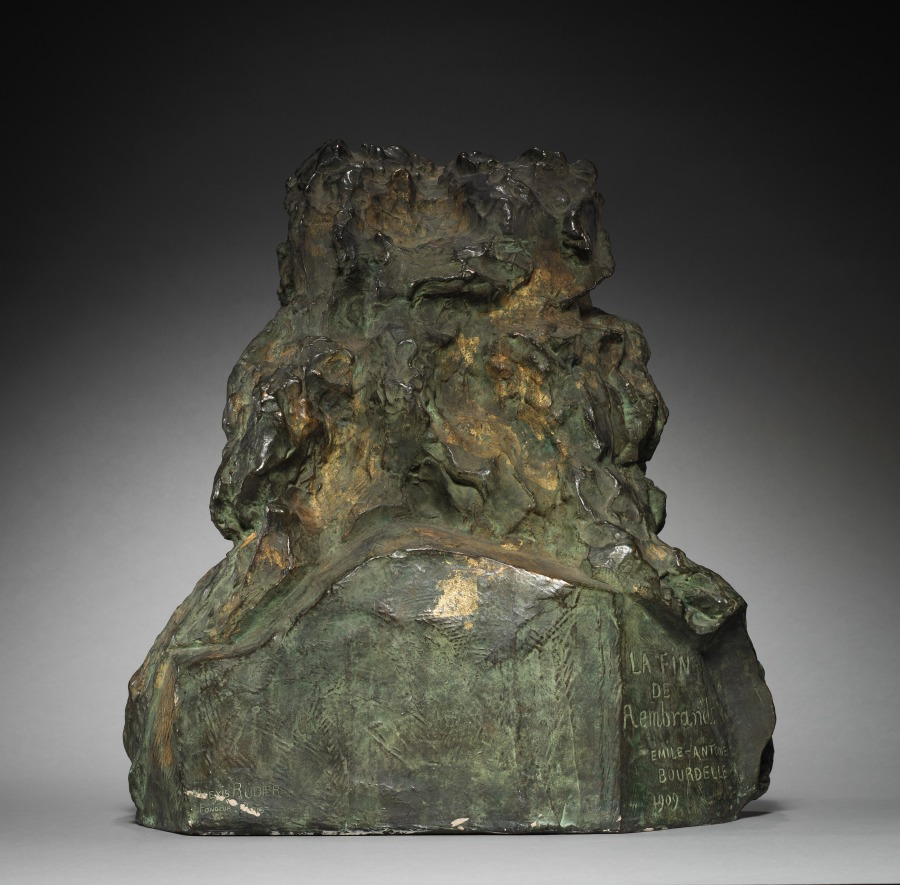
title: The End of Rembrandt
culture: France, 20th century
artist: Emile Antoine Bourdelle (French, 1861–1929)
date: 1909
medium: bronze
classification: Sculpture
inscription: Dated: "1909"